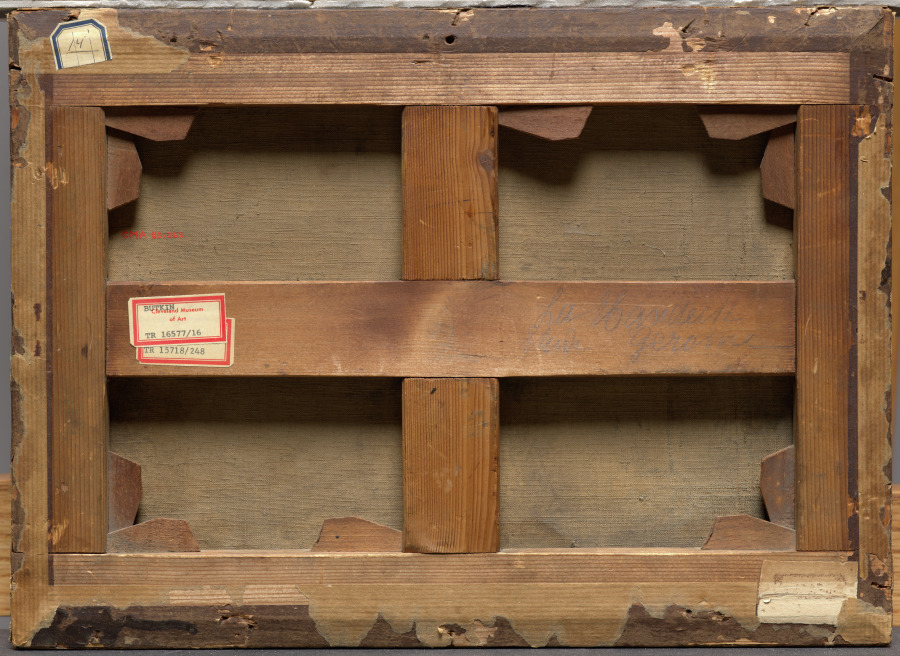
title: Alpine Landscape: The Handegg, Switzerland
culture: France, 19th century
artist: Jean-Léon Gérôme (French, 1824–1904)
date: 1850s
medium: oil on fabric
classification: Painting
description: This painting depicts a mountain peak near Handegg, a village just south of Lucerne, Switzerland. Tall fir trees reach upward from the dark foreground toward the light, which illuminates the sky and snowcapped mountains. Rising like church steeples, the trees almost touch the top of the canvas, conveying a feeling of spiritual striving. This expression of romantic, almost religious sentiment inspired by the power and beauty of nature is surprising for Gérôme, one of the leading artists of academic realism, a style distinguished by firm, precise drawing­.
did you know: In 1851, Gérôme decorated a vase for Emperor Napoleon III of France which was offered to Prince Albert of England and is now part of the Royal Collection at St. James’s Palace, London.